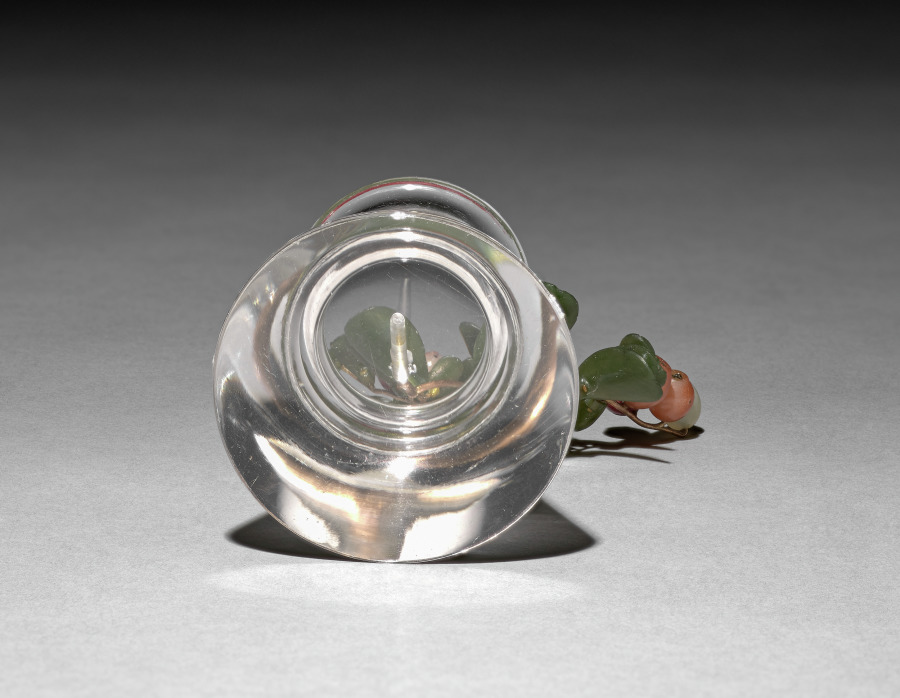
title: Flower Study of a Lowbush Cranberry or Lingonberry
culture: Russia, St. Petersburg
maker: House of Fabergé (Russian, 1842–1918)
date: c. 1885–1915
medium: chalcedony, jade, rock crystal, gold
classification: Miscellaneous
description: This flower study depicts a lowbush cranberry or lingonberry. To achieve a naturalistic effect of ripening fruit, Fabergé varied the coloring of the berries. Some are made of chalcedony in hues of milky white to represent unripe berries, while others appear in deep reddish agate to represent ripe ones. Fabergé’s inspiration for his flower studies is said to have come from the floral brooches of precious stones that were made in the 1700s for Catherine the Great as well as from the Japanese art of flower arranging, known as ikebana. Fabergé’s flower studies were given as intimate gifts to friends by the tsarina and others in the court. She also liked to take them around to wherever the imperial family was residing as a reminder of spring during the harsh Russian winters.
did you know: The stems of Fabergé’s flower studies are set into little basins carved from rock crystal to resemble pots of water.